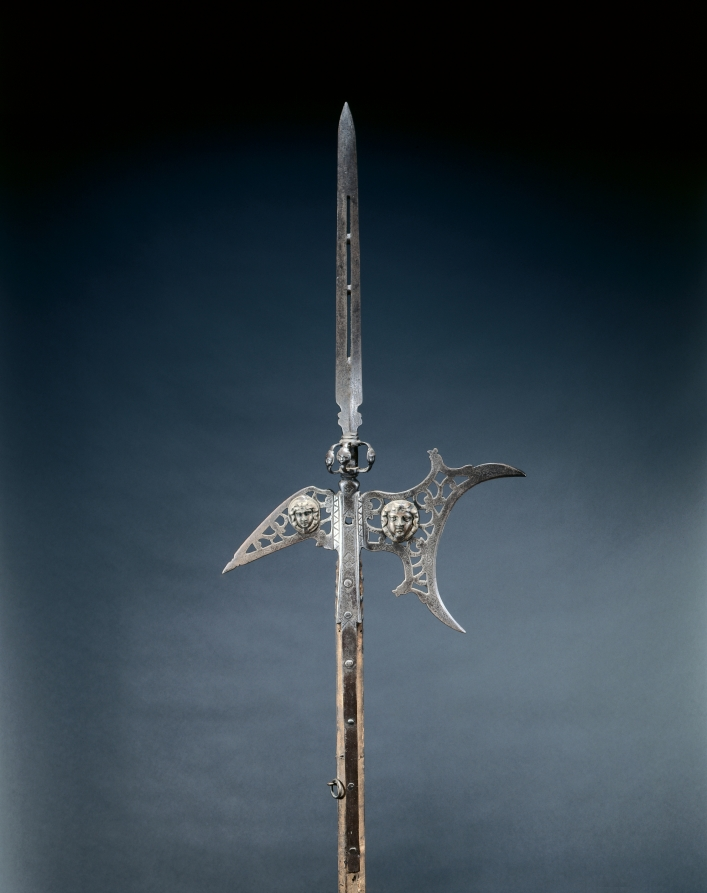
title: Halberd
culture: France, early 17th century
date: c. 1600–25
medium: steel, pierced; appliqué masks in brass; octagonal wood haft with studs and leather straps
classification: Arms and Armor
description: The halberd was a staff weapon favored by European infantries (foot soldiers) of the 1400s and 1500s for its versatility and deadly effect. The word halberd comes from the German words Halm (staff) and Barte (axe). The halberd is, in fact, an axe that served multiple functions: the axe blade was used for hacking, the spike for thrusting, and the beak for piercing plate armor or for pulling a knight from his saddle. The halberd was used by shock troops (those who lead an attack) and by Swiss and German mercenaries. After about 1550, the halberd gradually became less functional. Its large blade provided space for coats of arms and insignia. By the late 1500s, the parade halberd had become a ceremonial weapon for palace guards.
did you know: This highly decorative example would have been for ceremonial use only.